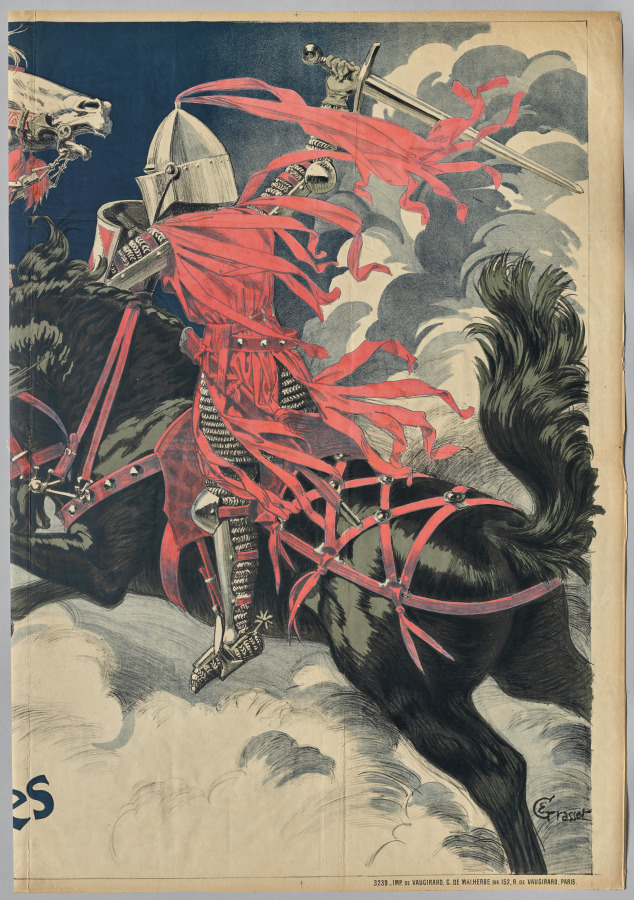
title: Andalusia at the Time of the Moors (right side)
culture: France, Paris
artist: Eugène Grasset (French, 1841–1917)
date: c. 1900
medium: color lithograph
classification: Print